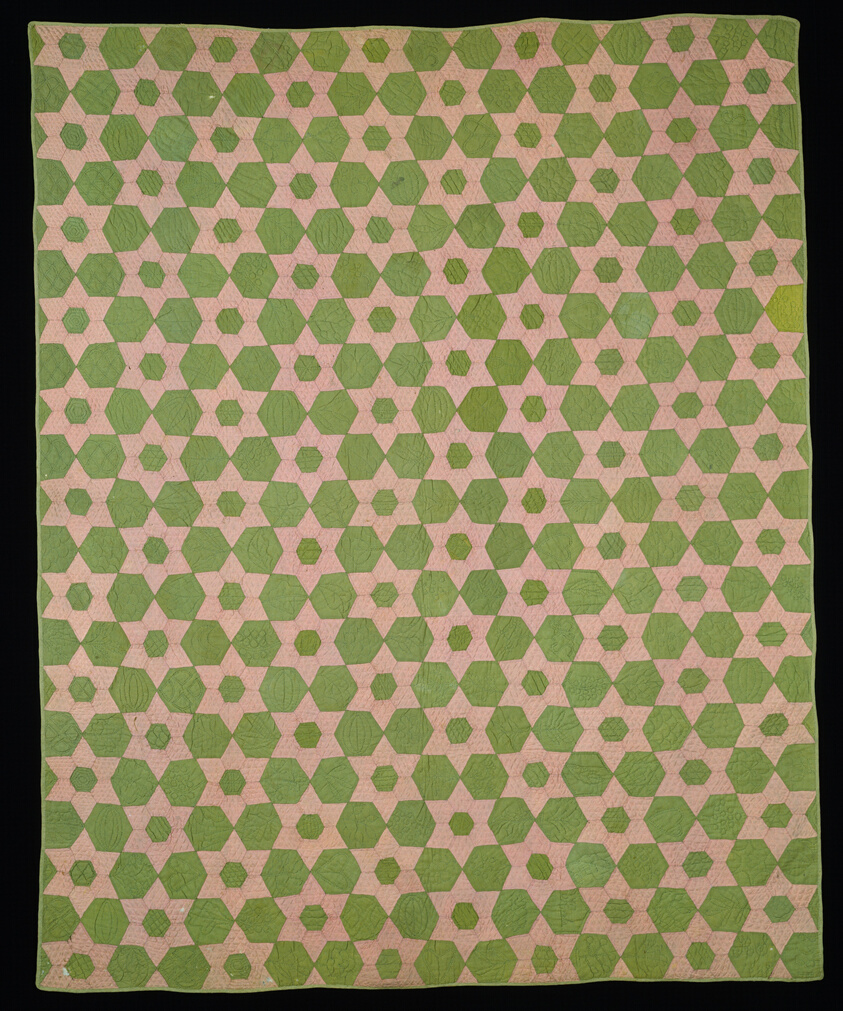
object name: Textile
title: Bedcover (Bride's Quilt)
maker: Sarah Catherine "Kate" (née Strother) McClanahan (American, 1834/35-1887); United States, Virginia or Kentucky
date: 1868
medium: Wool, plain weave; pieced; quilted with cotton; edged with wool, oblique twill interlacing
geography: United States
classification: textile; needlework - quilt